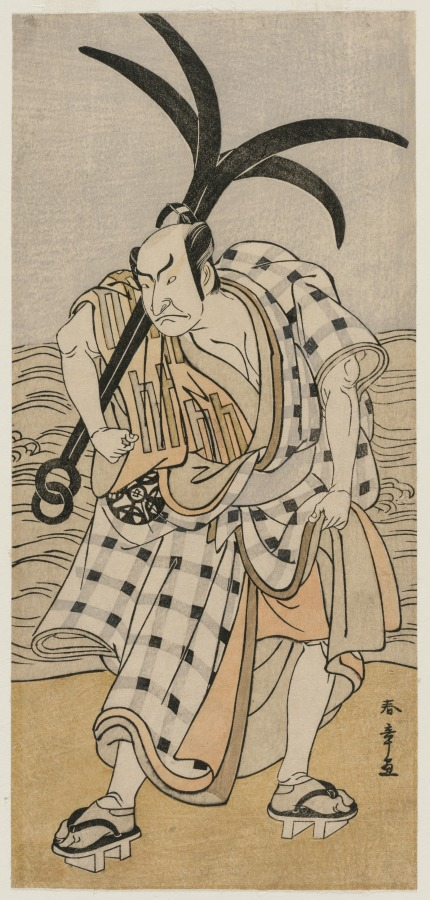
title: Nakamura Nakazo I as a Townsman Holding an Anchor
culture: Japan, Edo period (1615–1868)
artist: Katsukawa Shunshō (Japanese, 1726–1792)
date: c. 1780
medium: color woodblock print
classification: Print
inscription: Signature: Shunsho ga